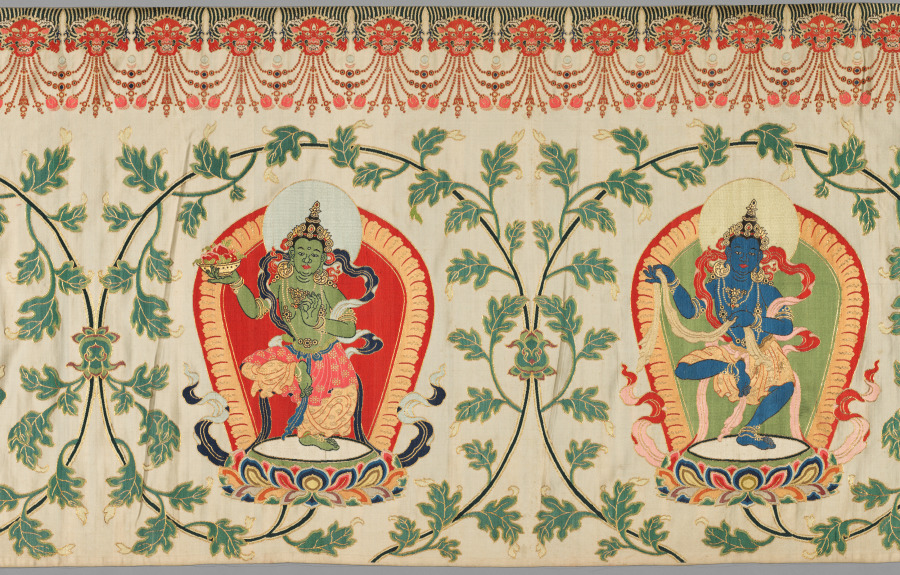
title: Brocaded Strip, known as "Imperial Tribute Brocade"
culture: China, Qing dynasty (1644-1911)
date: c. 1770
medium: brocaded satin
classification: Textile